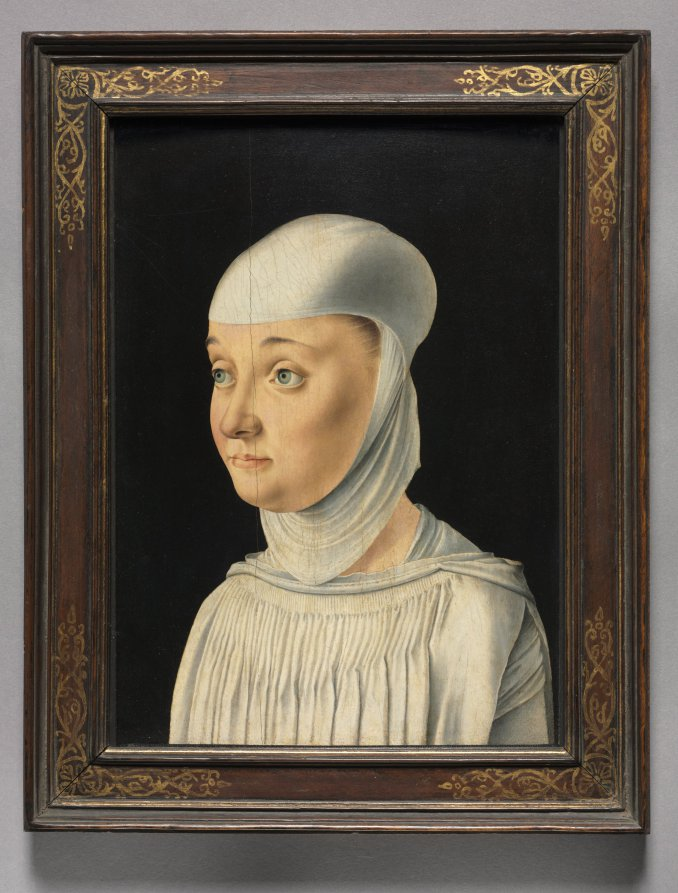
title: Portrait of a Woman, Possibly a Novice of San Secondo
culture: Italy, 15th century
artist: Jacometto Veneziano (Italian, 1497)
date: c. 1490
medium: oil on wood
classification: Painting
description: Scholars have recently speculated that this work does not actually depict a nun, although it has been described as such since 1543. A beautiful young woman presented as saintly, a regular occurrence, the sitter may be the wife or daughter of Alvise Contarini. Her attire, particularly the head garb, may be secular, while some scholars consider it to be Benedictine or Dominican. The San Secondo convent was reserved for daughters of the wealthiest Venetians and conventions of dress were fairly loose until 1515 when strict reforms were enforced by religious and political authorities in Venice.